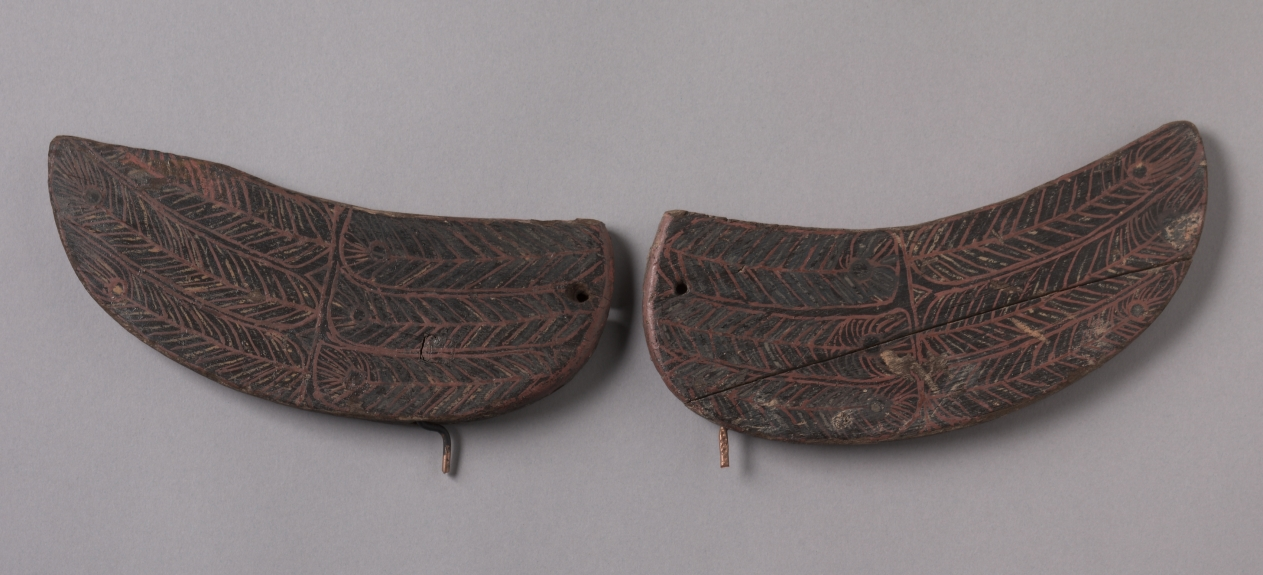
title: Cranes and Serpents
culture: China, reportedly from Hunan province, Changsha, Warring States period (475–221 BCE), State of Chu (c. 1046–223 BCE)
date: 475–221 BCE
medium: lacquered wood with polychromy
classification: Sculpture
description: A different style of ritual art developed in the state of Chu in South China. In addition to bronze vessels, lacquered wood artifacts expanded the repertory of ritual implements. This extraordinary sculpture was probably a drum stand for supporting a suspended drum in ritual ceremonies. It is unique among other excavated drum stands of the Chu, which typically show two birds standing on tigers. The theme of the bird stepping on the serpent was common in the Chu visual culture. Yet the slender proportions and seemingly flimsy structure of this particular set raise the question of whether it was utilitarian or mostly served symbolic functions in the tomb. The birds' and serpents' bodies have designs painted in red lacquer and yellow pigment against the black lacquer. Scientific analyses confirm the additional use of a blue or green pigment that has been discolored over time.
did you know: The cranes' long necks allowed a lightweight drum to be suspended from strings through the beaks, while the densely intertwined snakes provided a weighty base to stabilize the object during musical performances.